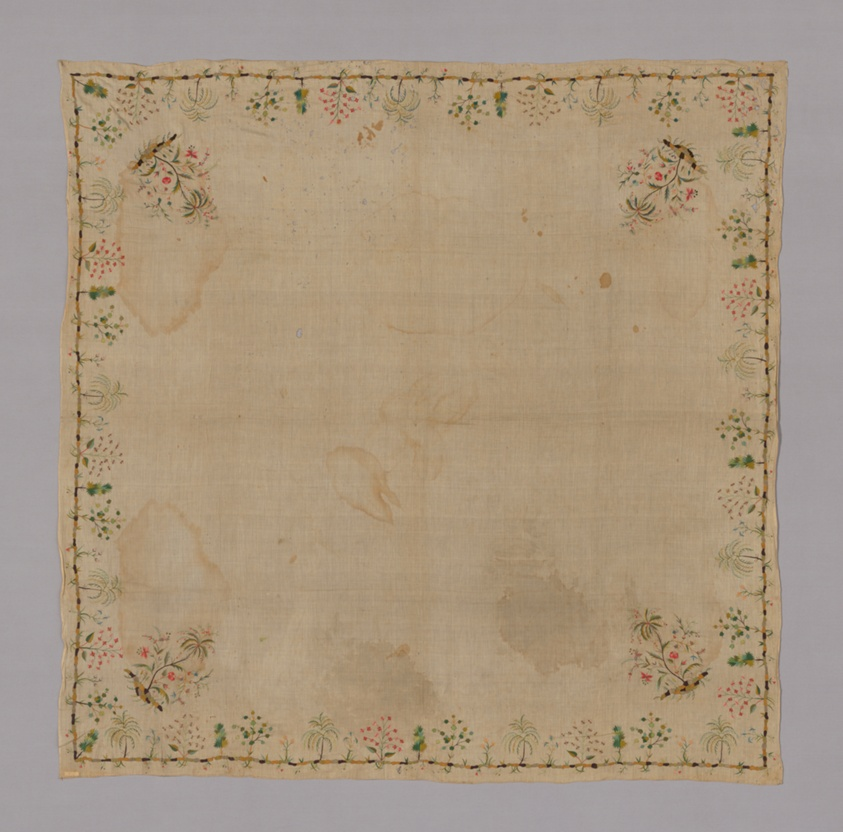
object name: Textile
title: Cover or HandKerchief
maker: Turkey, Istanbul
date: 1850/1875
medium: borders embroidered with colored silk floss in flower and tree forms.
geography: Turkey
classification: textile; needlework (visual works); weaving